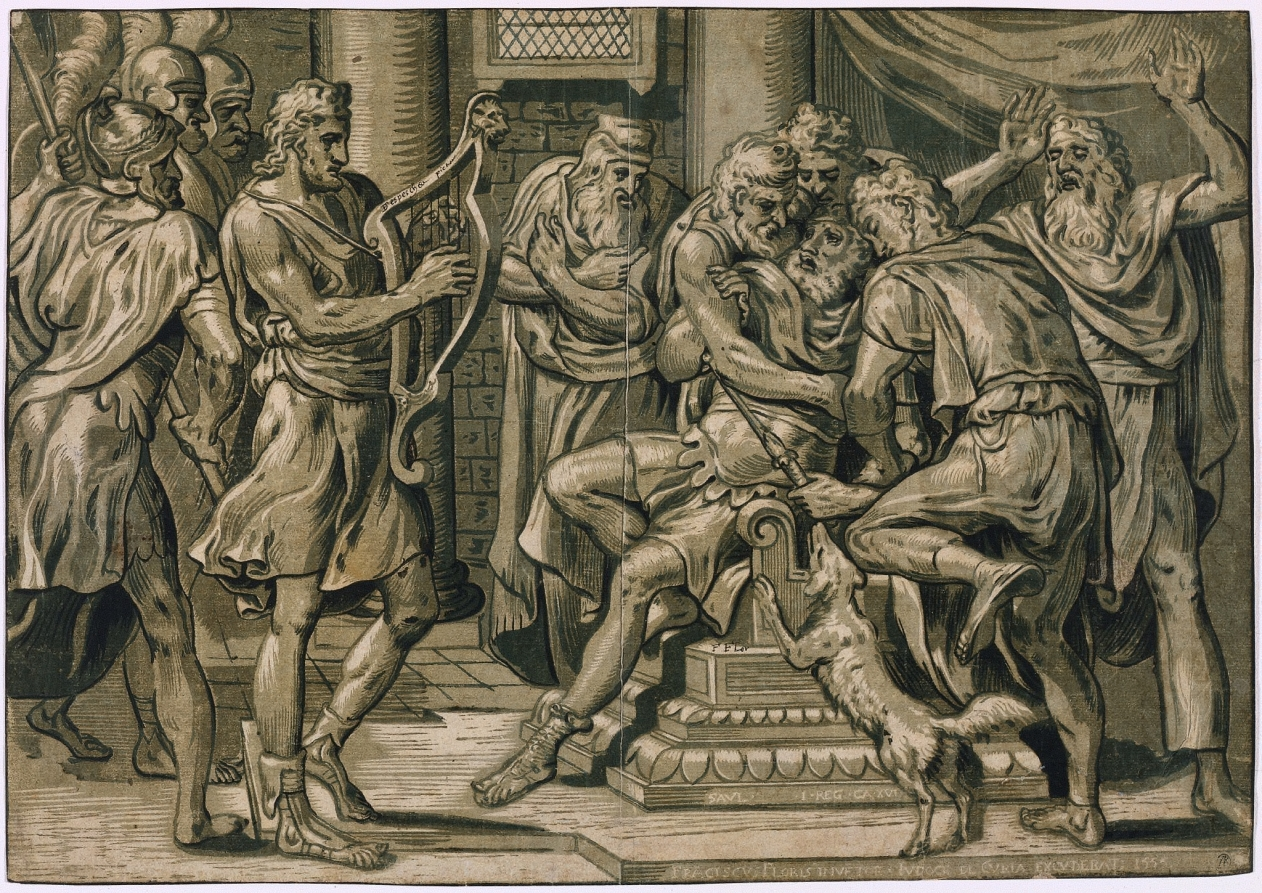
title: David Playing the Harp before Saul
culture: Netherlands, 16th century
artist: after Frans Floris (Netherlandish, 1519–1570)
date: 1555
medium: chiaroscuro woodcut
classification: Print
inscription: in block, " SAVL I REG CA XVI/FRACISCVS FLORIS INVETOR IVDOCE DL CVRIA EXCVDERAT 1555". (Later) inscriptions in the image penned in black. VERSO: Additional inscriptions in brown ink and graphite.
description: The soothing effect of David’s music upon the melancholic King Saul, as relayed in the Old Testament and depicted here by Frans Floris, is the earliest visual evidence of the therapeutic use of music. Floris’s woodcut would have had contemporary relevance in its affirmation of Martin Luther’s belief that music-a divine power that creates order—had been made by God to combat the destructive power of evil.